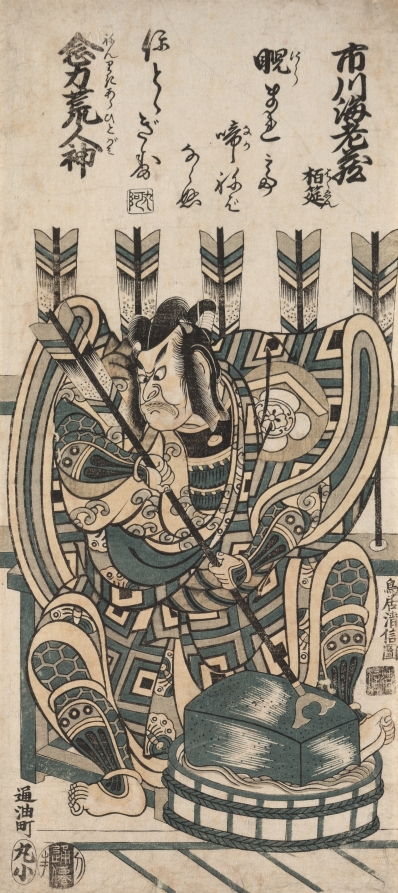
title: Ichikawa Ebizo III as Yanone Goro in Nenriki arahitogami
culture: Japan, Edo period (1615–1868)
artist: Torii Kiyonobu II (Japanese, 1706–1763)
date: 1758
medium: color woodblock print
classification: Print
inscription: Signature: Torii Kiyonobu zu Artist Seal: Kiyonobu Publisher: Maruya Kohei (Maruko, Toriaburacho) Engraver: Tsusen kan ?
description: Yanone (The Arrowhead) was one of the most famous plays in the Ichikawa Danjuro family repertoire. Goro, the hero of the play, sharpens arrowheads as a friend comes to wish him a happy New Year. Corny jokes and the sight of Goro in flamboyant clothing made the play very popular.